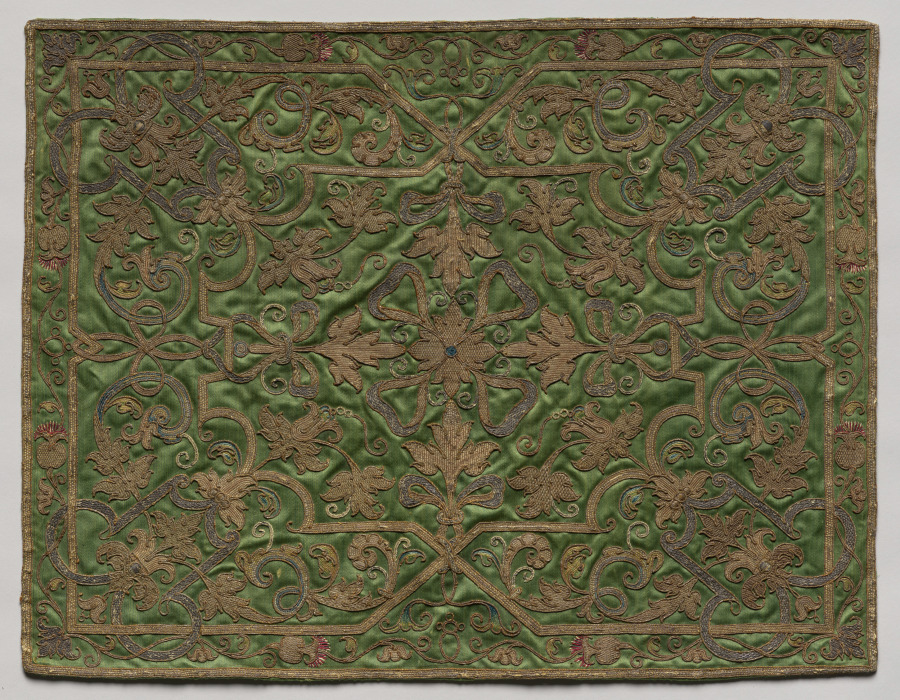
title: Apparel from a Dalmatic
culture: Italy, early 16th century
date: early 1500s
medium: embroidery; silk and metallic threads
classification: Embroidery